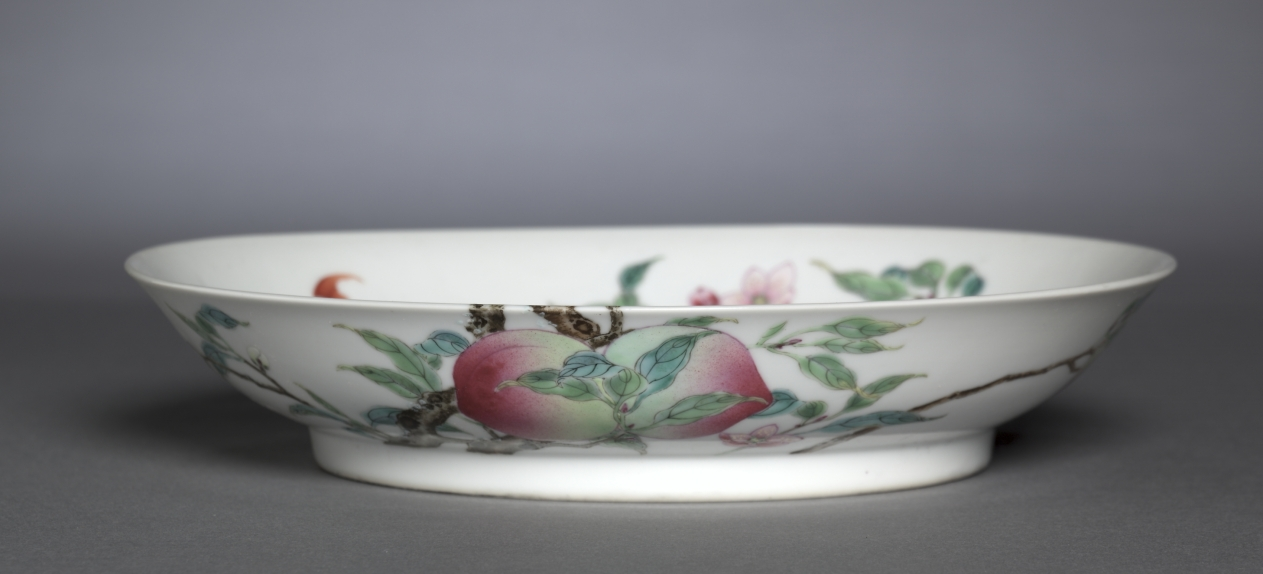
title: Dish with Bats and Peaches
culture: China, Jiangxi province, Jingdezhen kilns, Qing dynasty (1644-1911), Yongzheng mark and reign (1722-35)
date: 1723–35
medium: porcelain with famille rose overglaze enamel decoration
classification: Ceramic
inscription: 大清雍正年制